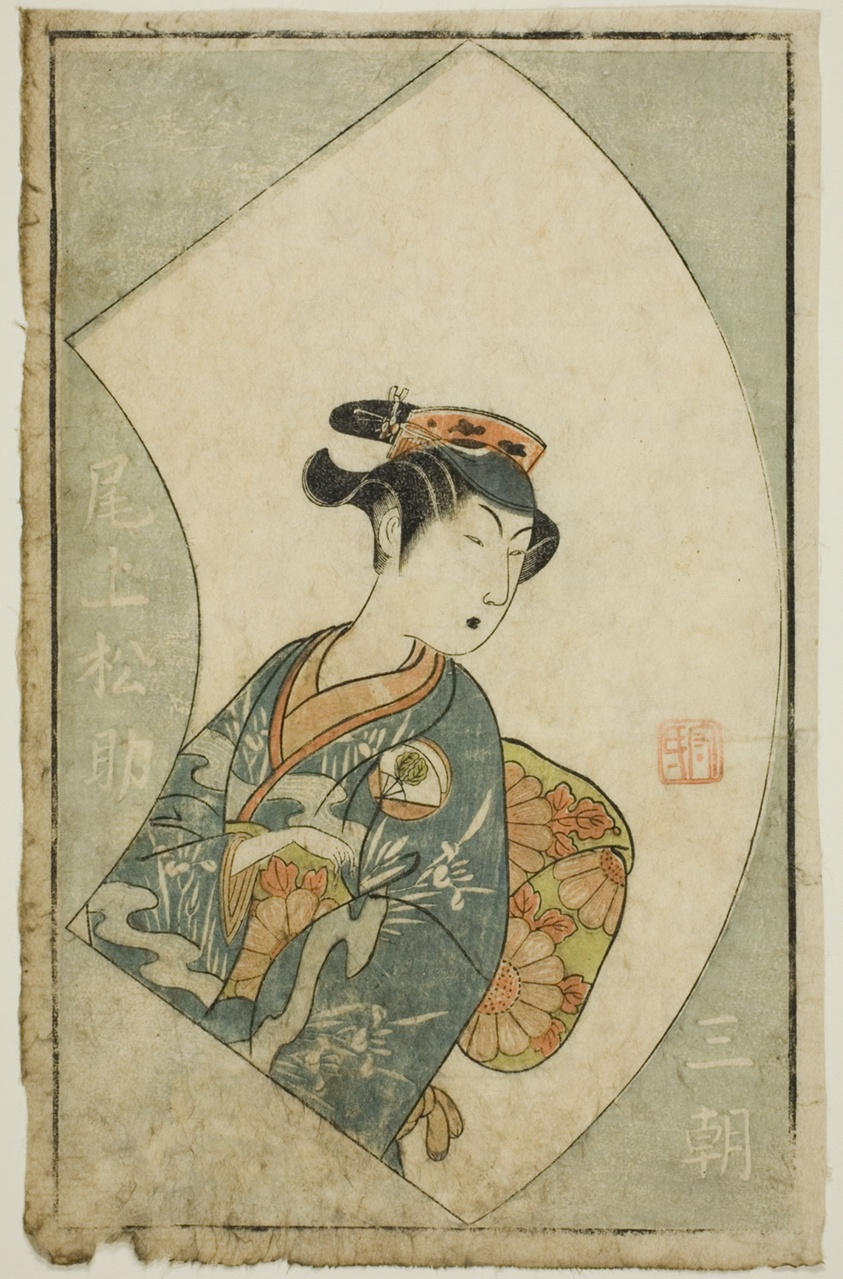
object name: Print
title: The Actor Onoe Matsusuke I, page from "A Picture Book of Stage Fans (Ehon butai ogi)"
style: Japanese (culture or style)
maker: Ippitsusai Buncho (Japanese, active c. 1755-90)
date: 1770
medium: Color woodblock print; page from illustrated book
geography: Japan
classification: woodblock print; print; asian art